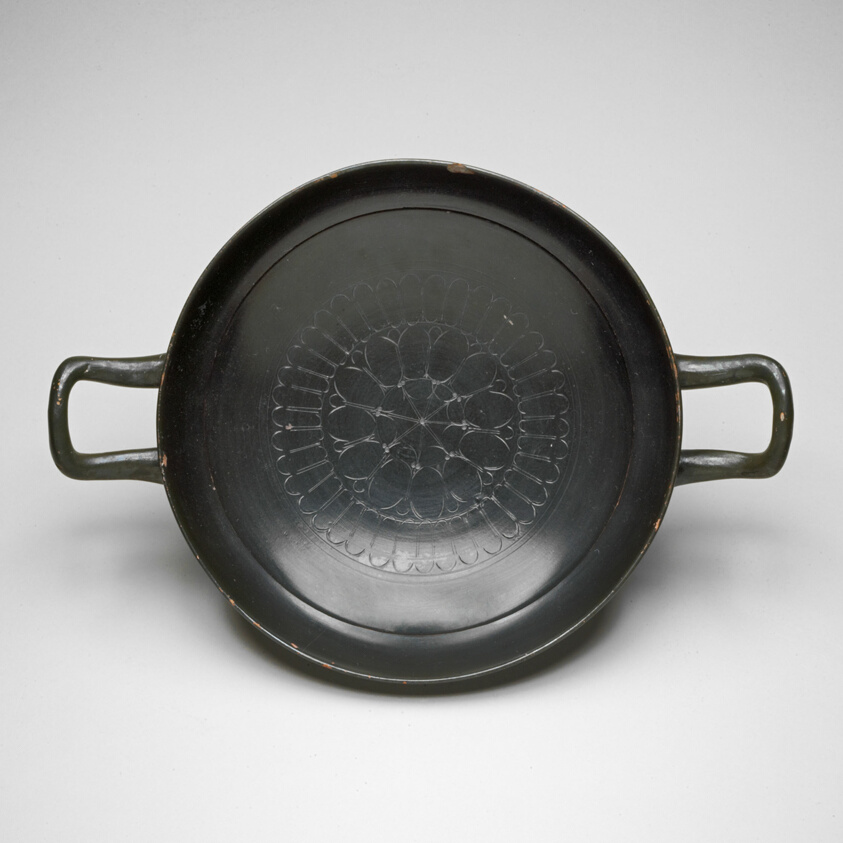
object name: Vessel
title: Stemless Kylix (Drinking Cup)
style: greek, ancient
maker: Greek; Athens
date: 460-450 BCE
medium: terracotta, black-glaze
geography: Cales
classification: drinking vessel; vessel; ancient art; container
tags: dining, drinking